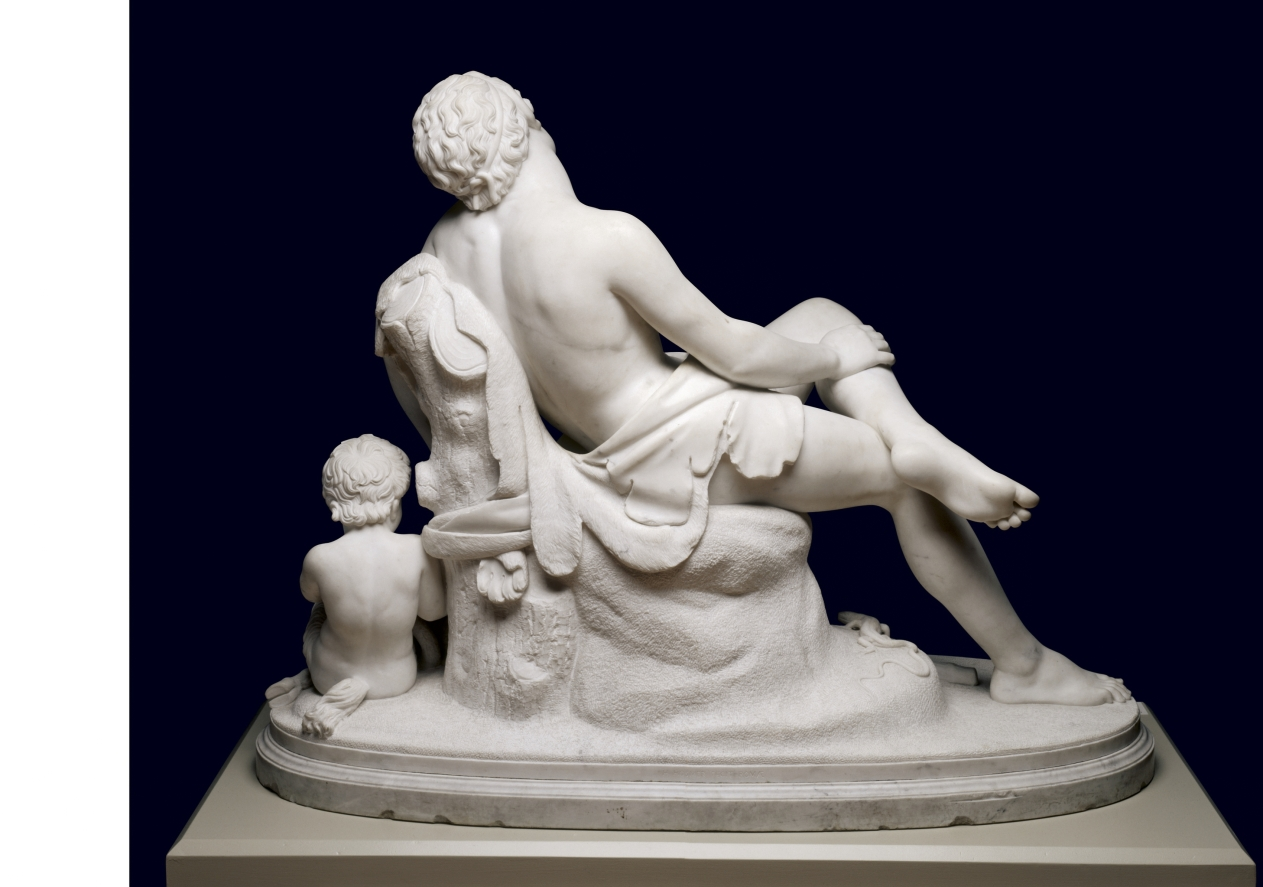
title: The Sleeping Faun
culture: America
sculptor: Harriet Goodhue Hosmer (American, 1830–1908)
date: modeled 1864, carved c. 1870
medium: marble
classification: Sculpture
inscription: Signed and inscribed on base: "H HOSMER Fecit -- Romae"; titled on base: "THE SLEEPING FAUN"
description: Hosmer is the best known female member of a large group of American artists working in Italy during the mid-1800s. The Sleeping Faun, a depiction of a pointed-eared woodland spirit, demonstrates her mastery of the neoclassical style, which was inspired by the art of ancient Greece and Rome. Hosmer’s playful sense of humor infuses the composition: a half-human, half-goat satyr mischievously ties the unwitting faun’s animal skin garment to a tree stump.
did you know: Hosmer said, "I honor every woman who has strength enough to step out of the beaten path. . . ."